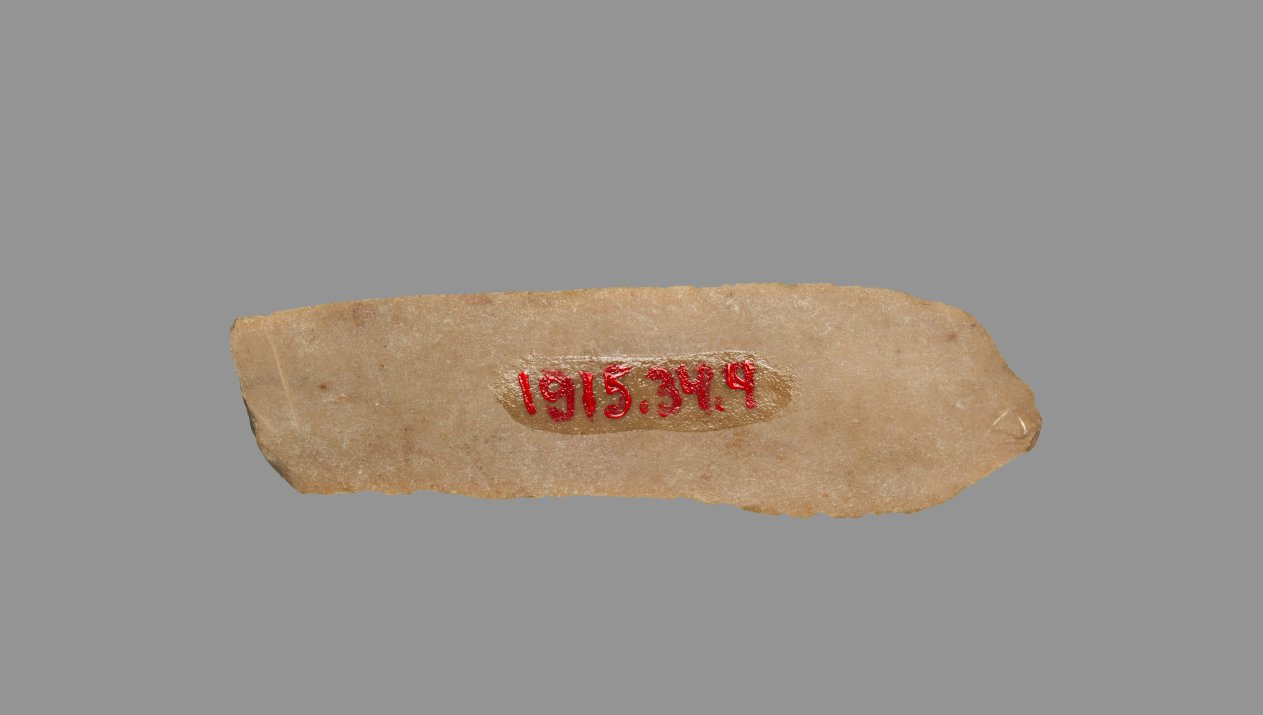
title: Sickle Blade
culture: Egypt, Middle Kingdom (2040–1648 BCE), Dynasty 12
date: 1980–1801 BCE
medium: flint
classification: Implements